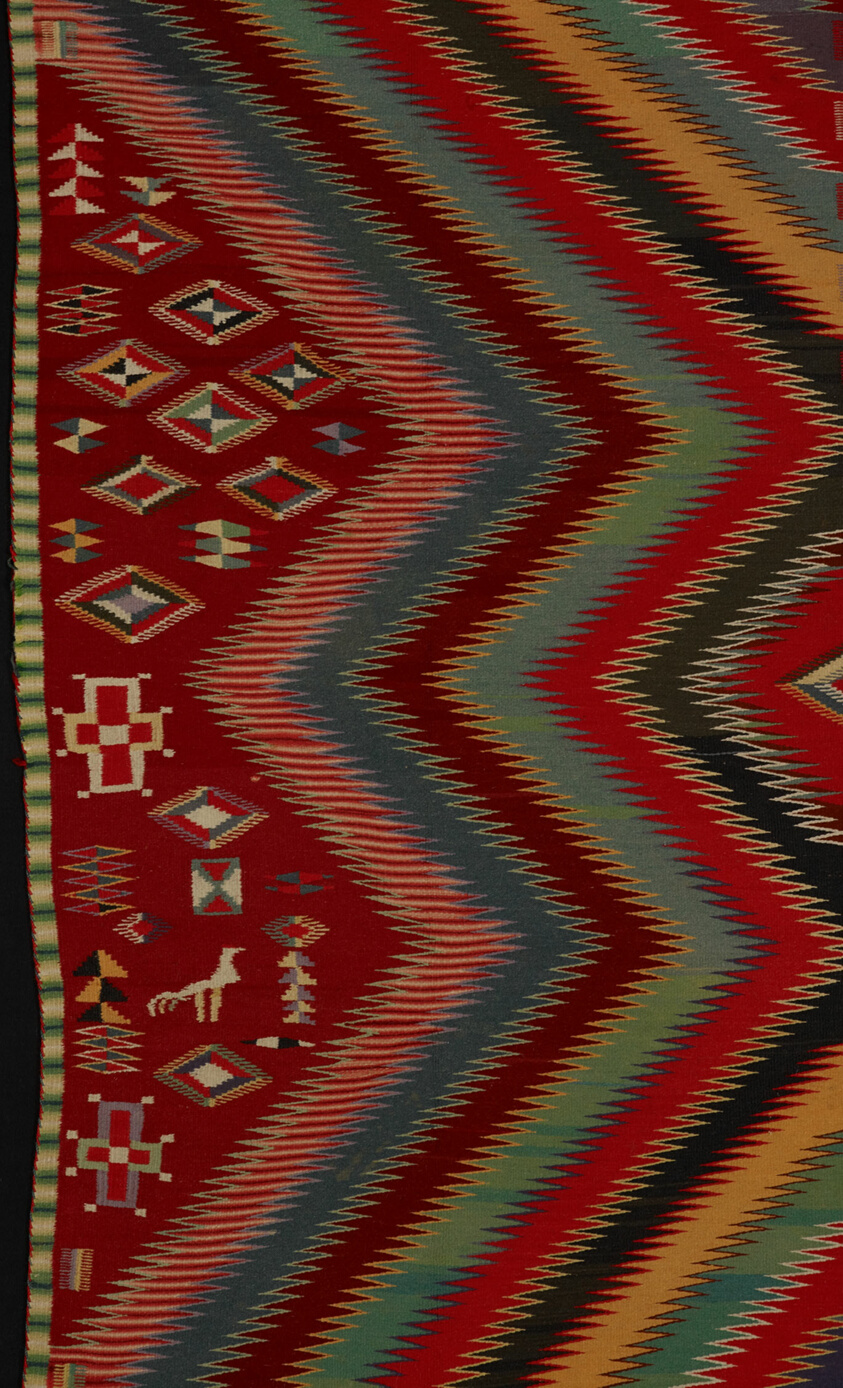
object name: Textile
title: "Eye-Dazzler" Weaving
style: navajo, native american, americas, Folk Art, 19th century, indigenous, north american, native north american, eye-dazzler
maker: Navajo (Diné) (Arizona, New Mexico, and Utah, United States)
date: 1880/1900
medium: Cotton and wool, single interlocking tapestry weave; twined selvages and heading, overcast finish terminating in tassels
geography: Navajo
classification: textile; weaving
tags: geometric, zigzags